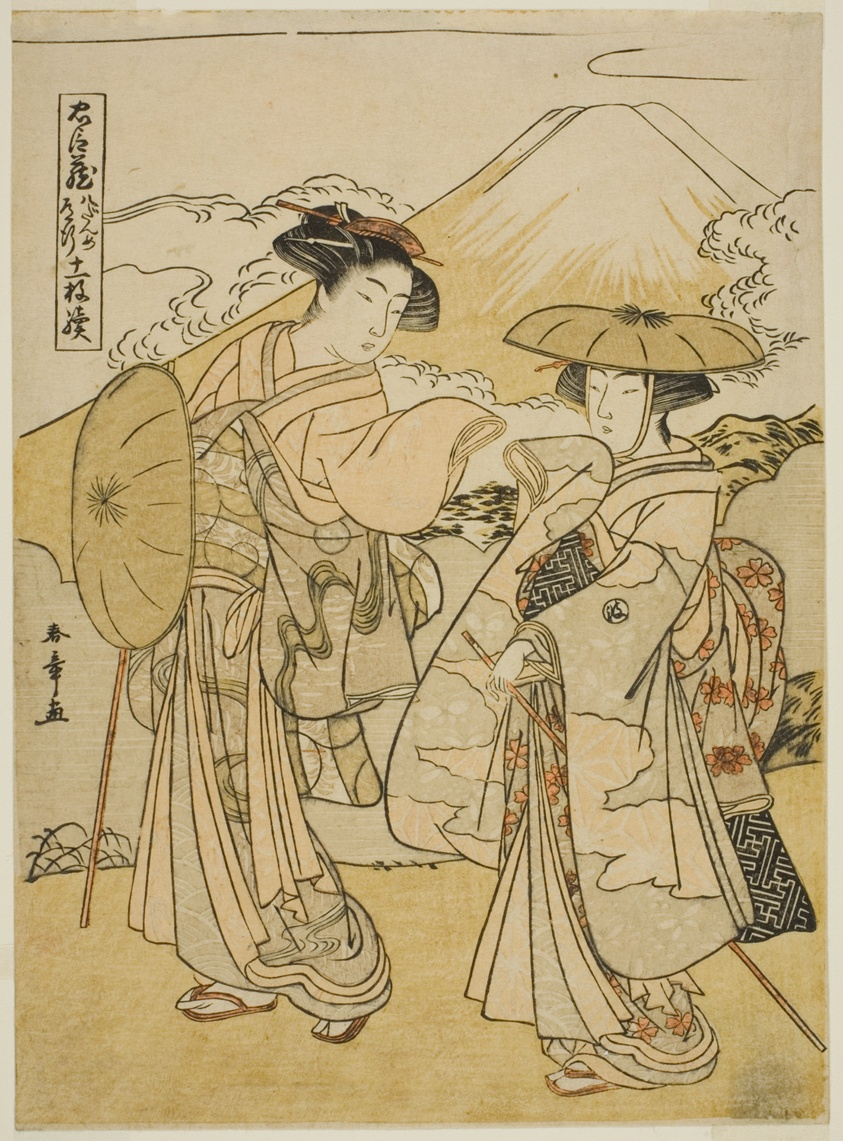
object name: Print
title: Act Eight: Bridal Journey, from the play "Treasury of Loyal Retainers (Chushingura)"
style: Japanese (culture or style)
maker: Katsukawa Shunsho 勝川 春章; Japanese, 1726-1792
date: c. 1779/80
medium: Color woodblock print; chuban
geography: Japan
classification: woodblock print; print; asian art